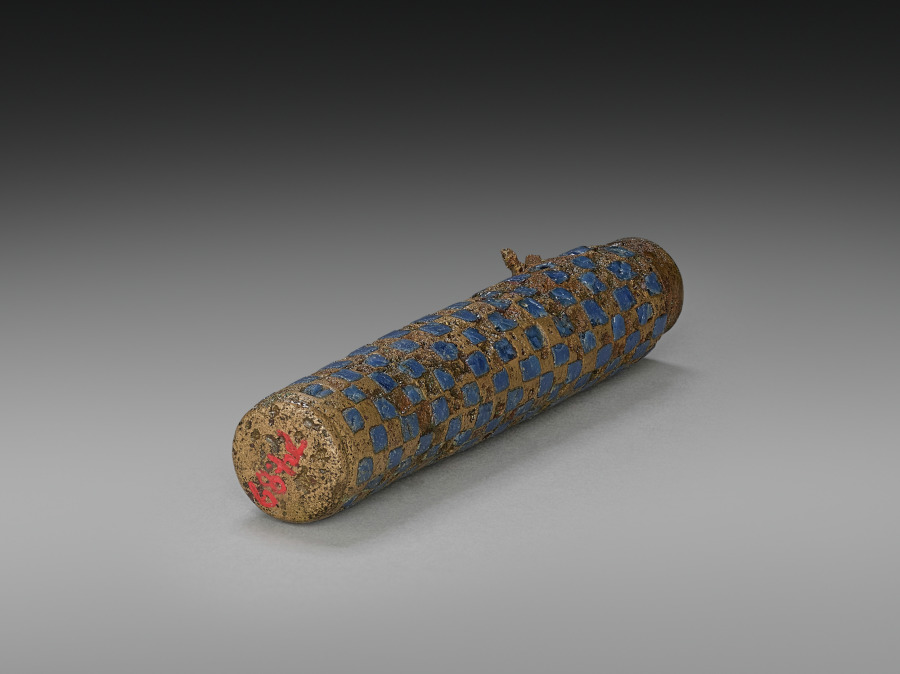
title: Kohl Tube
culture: Egypt, Greco-Roman period (332 BCE–395 CE), Ptolemaic dynasty (305–30 BCE)–Roman empire (30 BCE–395 CE)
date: 305 BCE–395 CE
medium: brass with blue enamel decoration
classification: Cosmetic Objects